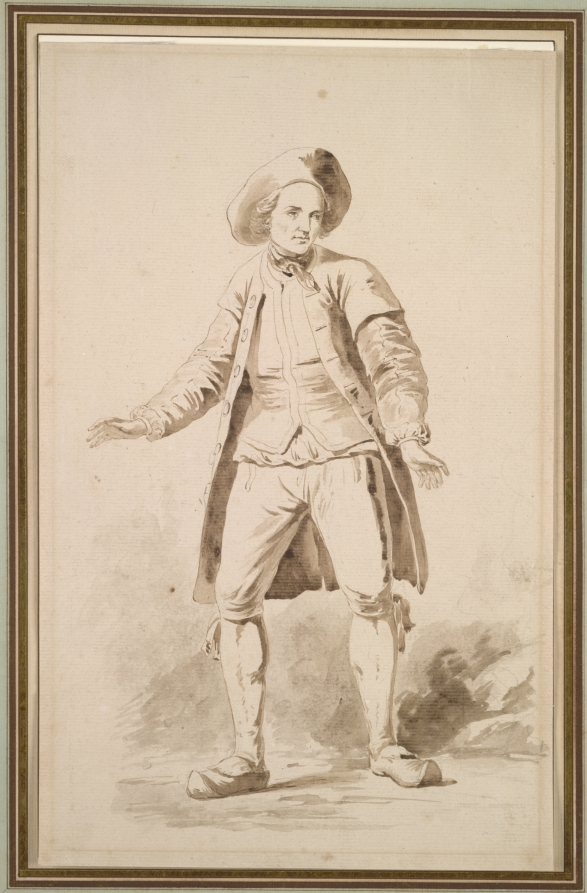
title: The Actor Clairval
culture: France, 18th century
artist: Étienne Aubry (French, 1745–1781)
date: 18th century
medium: sepia ink and wash with graphite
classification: Drawing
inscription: Mat inscribed in brown ink: Clairval par Aubry. Verso, in pencil, upper center: Clairval